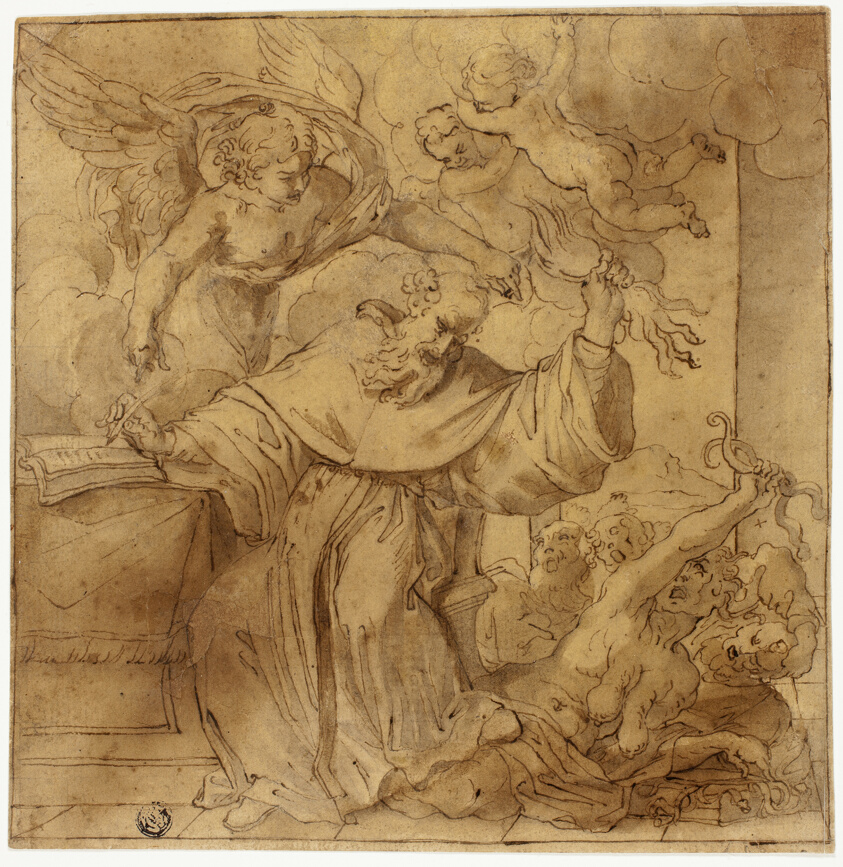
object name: Drawing and Watercolor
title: Temptation of Saint Anthony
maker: Possibly school of the Carracci Family (Italian, flourished 16th-17th century); or possibly Lodovico Carracci (Italian, 1555-1619); or possibly school of Giovanni Battista Trotti (Italian, 1555-1619)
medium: Pen and brown ink, with brush and brown wash, over traces of graphite, on tan laid paper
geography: Italy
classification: pen and ink drawings; drawings (visual works); prints and drawing